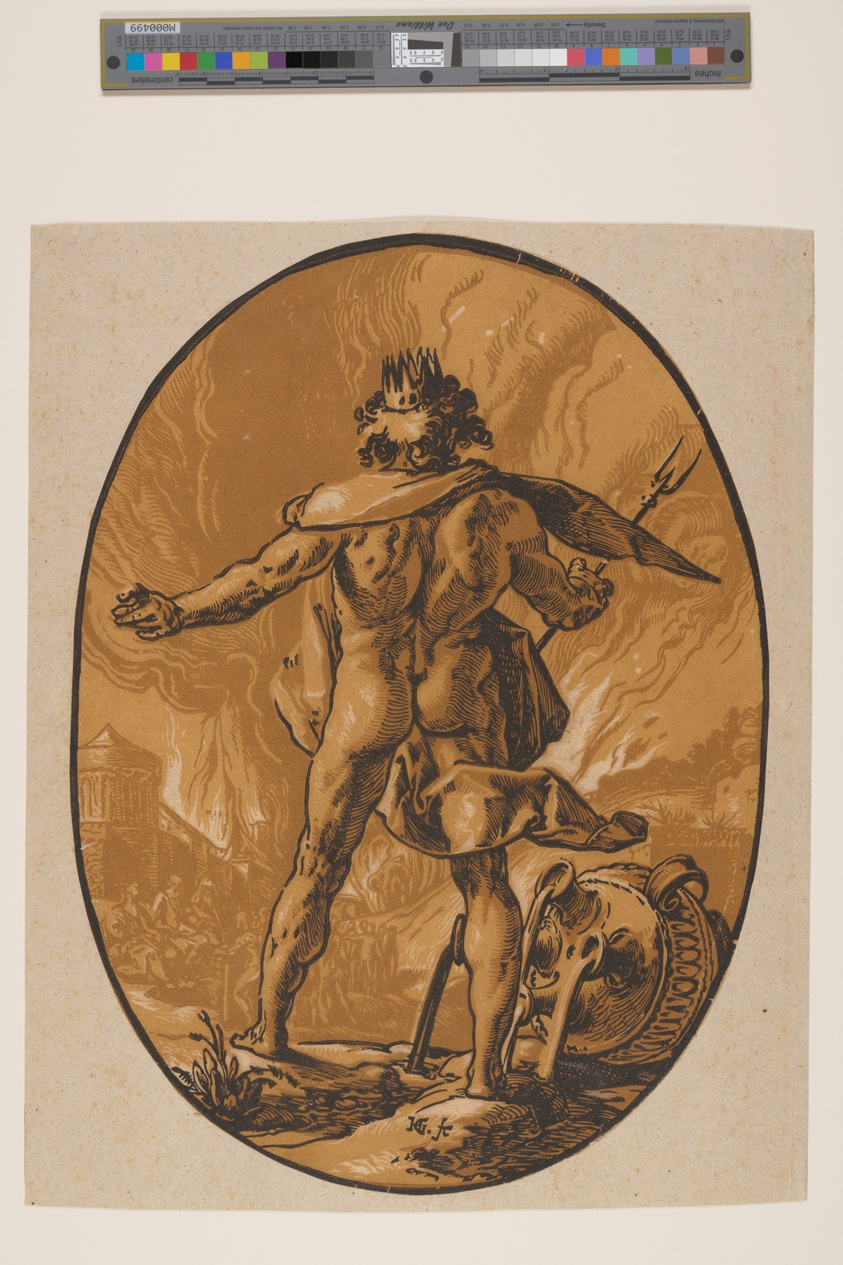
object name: Print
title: Pluto, from The Deities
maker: Hendrick Goltzius (Dutch, 1558–1617)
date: 1588/90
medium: Chiaroscuro woodcut from three blocks in ochre and brown on ivory laid paper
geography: Netherlands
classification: print; paper; prints and drawing; woodcut